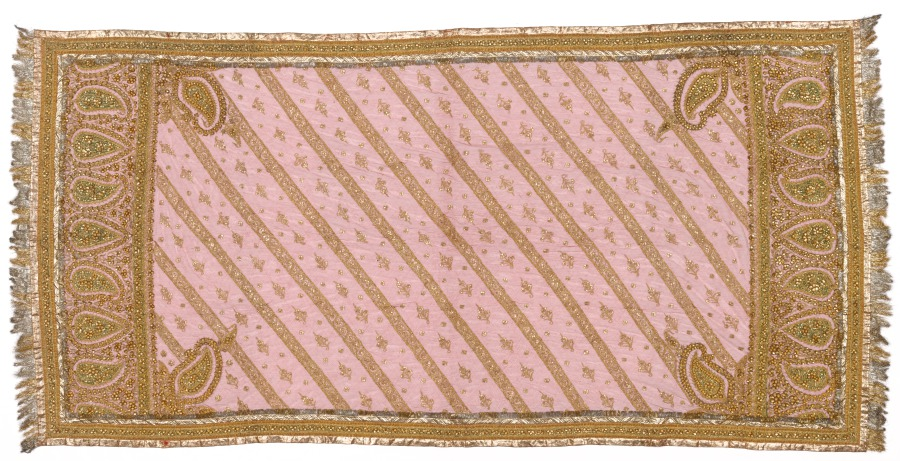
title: Metal Embroidery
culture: India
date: early 1900s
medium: Silk net with metal thread, embroidery and sequins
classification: Embroidery